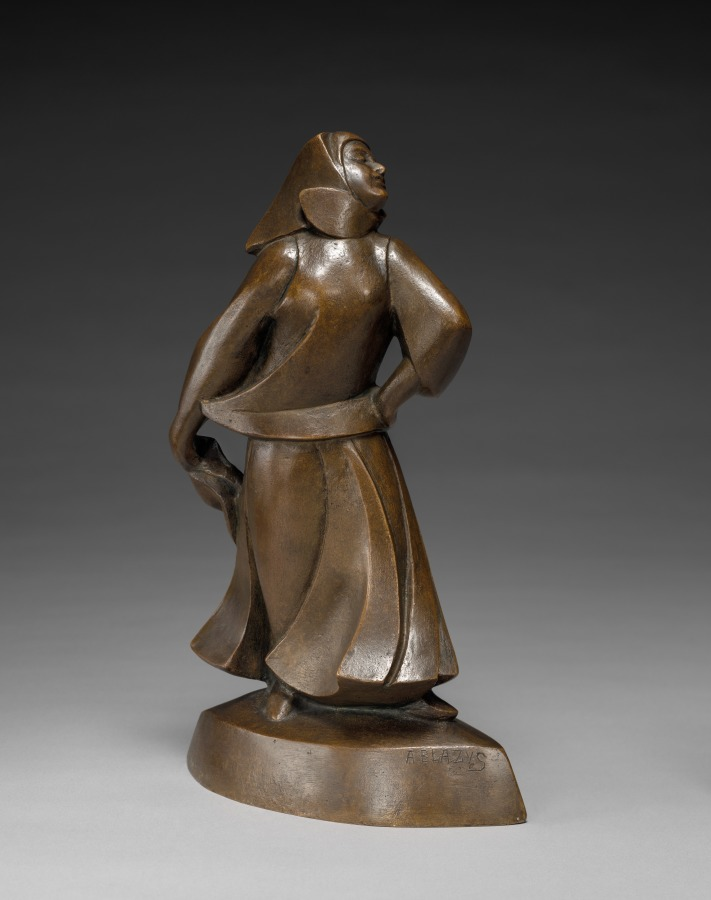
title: Russian Dancer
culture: America, Ohio, Cleveland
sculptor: Alexander Blazys (American, born Russian Empire [now Lithuania], 1894–1963)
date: 1925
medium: bronze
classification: Sculpture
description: A Lithuanian immigrant, Blazys introduced modernist sculpture to Cleveland upon his arrival in 1925. These figures merge rhythmic movement inspired by music with faceted, geometric planes derived from Cubism.